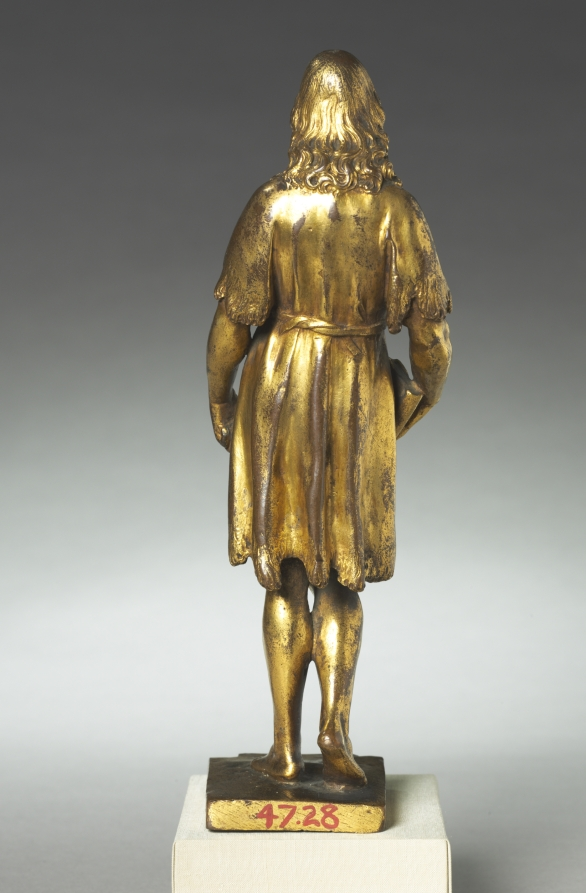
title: Saint John the Baptist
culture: Italy, Venice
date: c. 1550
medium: gilt bronze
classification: Sculpture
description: This small bronze, covered with gold, was produced in multiple versions. Saint John stands here, looking calm and composed, in a rather graceful pose. This piece has a sense of forward motion even though the figure appears to be leaning back in this stance. Elegant and subtle, this piece is a beautiful example of small cast Renaissance bronzes.